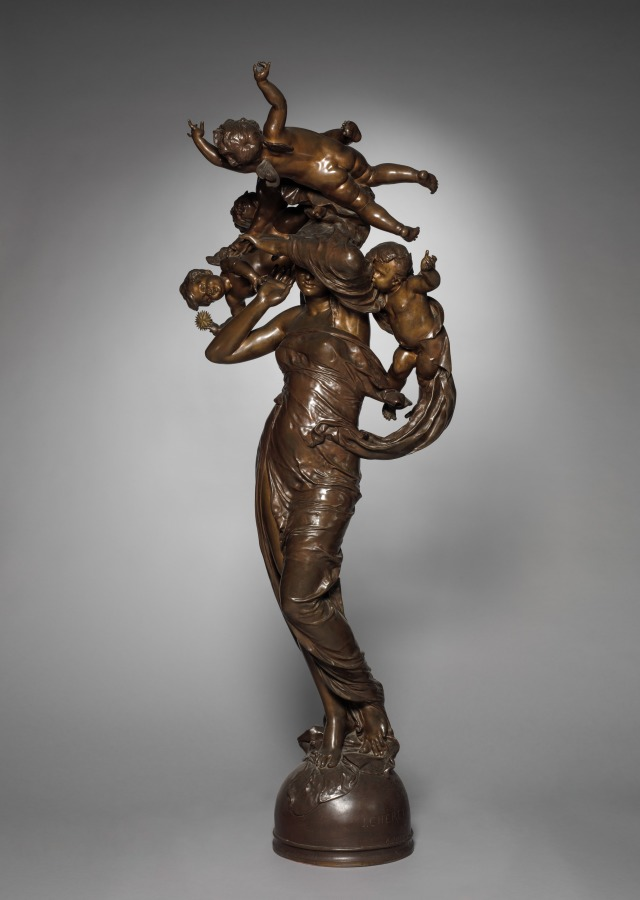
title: Dawn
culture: France, 19th century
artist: Gustave-Joseph Chéret (French, 1838–1894)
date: c. 1883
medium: bronze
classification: Sculpture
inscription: signed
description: This sculpture is of the same design as one exhibited by Chéret at the Paris Salon of 1883.